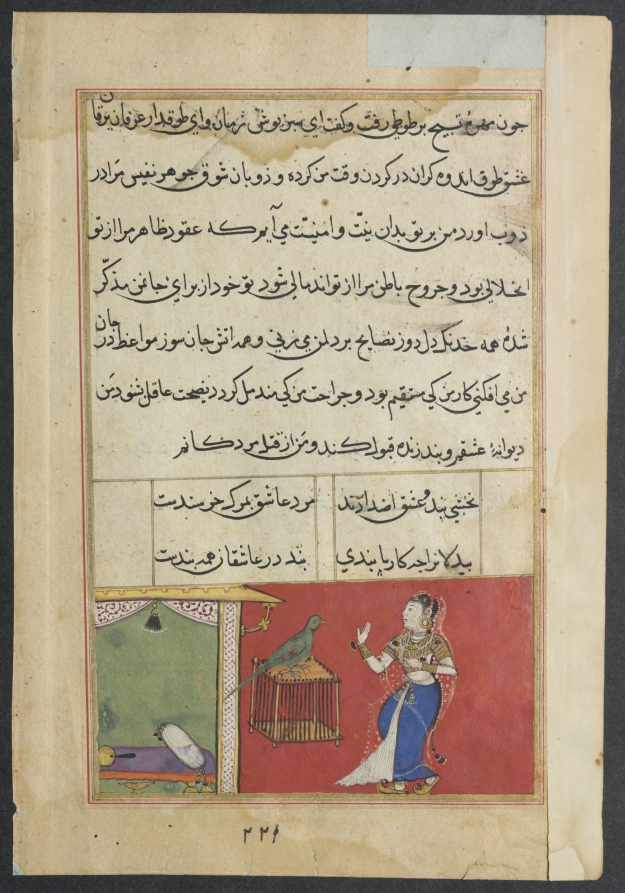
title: The parrot addresses Khujasta at the beginning of the forty-seventh night, from a Tuti-nama (Tales of a Parrot): Forty-seventh Night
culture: Mughal India, court of Akbar (reigned 1556–1605)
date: c. 1560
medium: gum tempera, ink, and gold on paper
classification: Painting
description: Against a brightly colored red and green background, Khujasta meets with Tuti the talking parrot. In order to keep her from leaving to visit her lover, the parrot tells Khujasta a moralizing story about four friends who were given magical shells by a wise man.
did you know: The flat planes of bold color were favored by Indian artists before the time of Akbar.